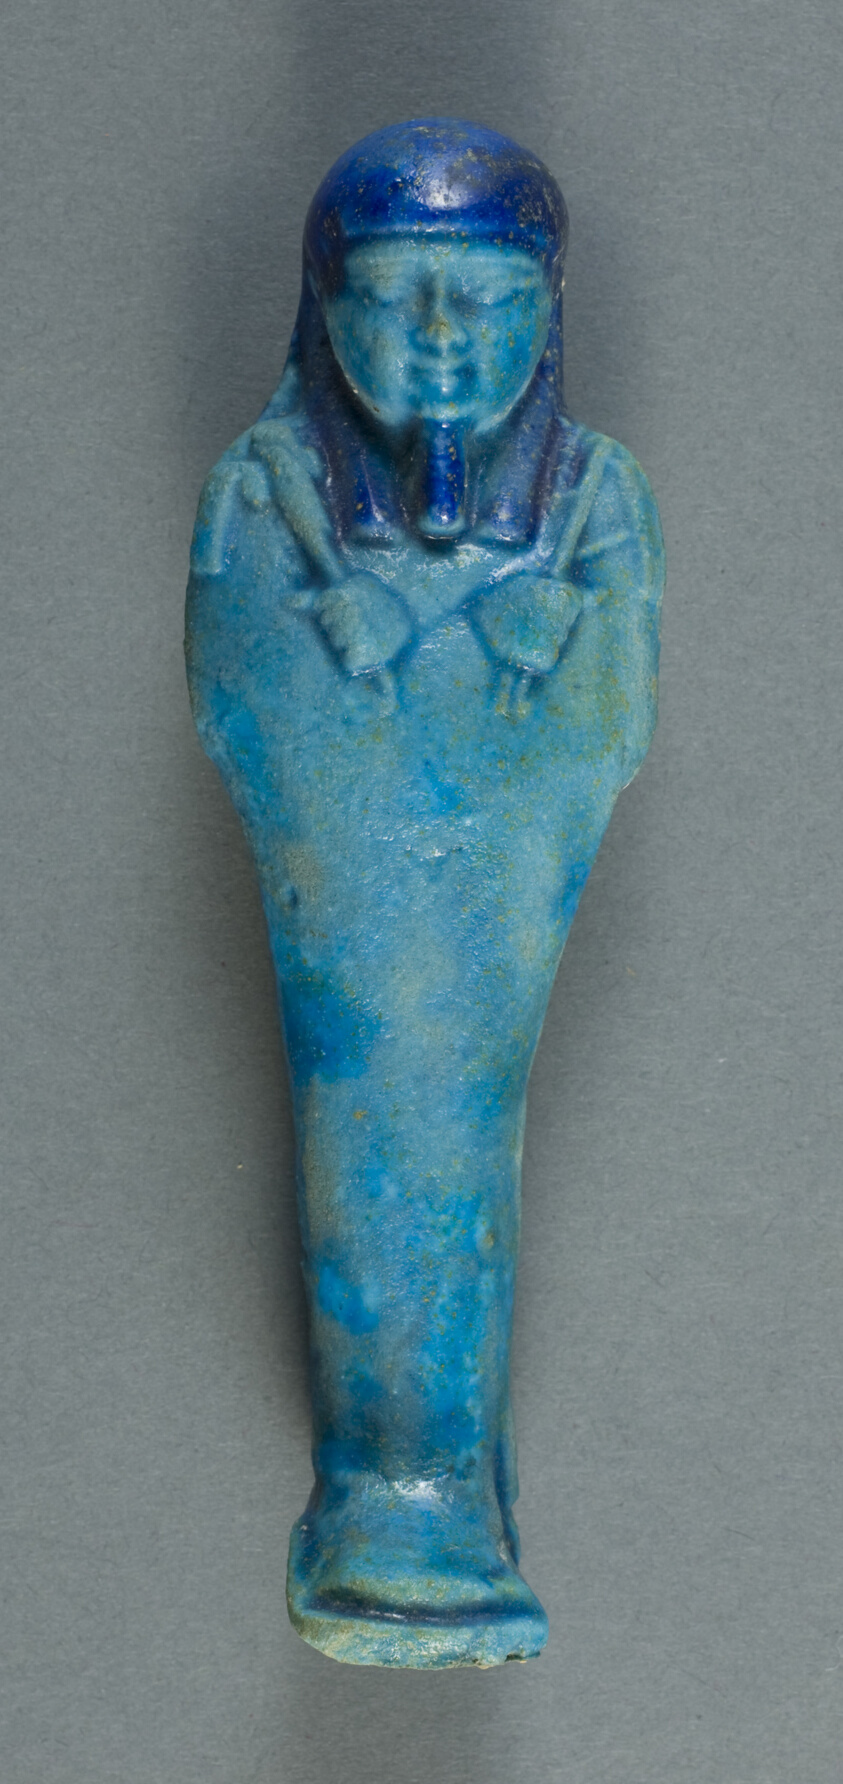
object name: Funerary Object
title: Shabti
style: thirtieth dynasty, late period (egyptian)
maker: Egyptian; Kaw el-Kebir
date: Late Period, Dynasty 30 (380 BCE–343 BCE)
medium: Faience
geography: Egypt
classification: ushabti; funerary; figurine; ceramics; ancient art; faïence (composite material)